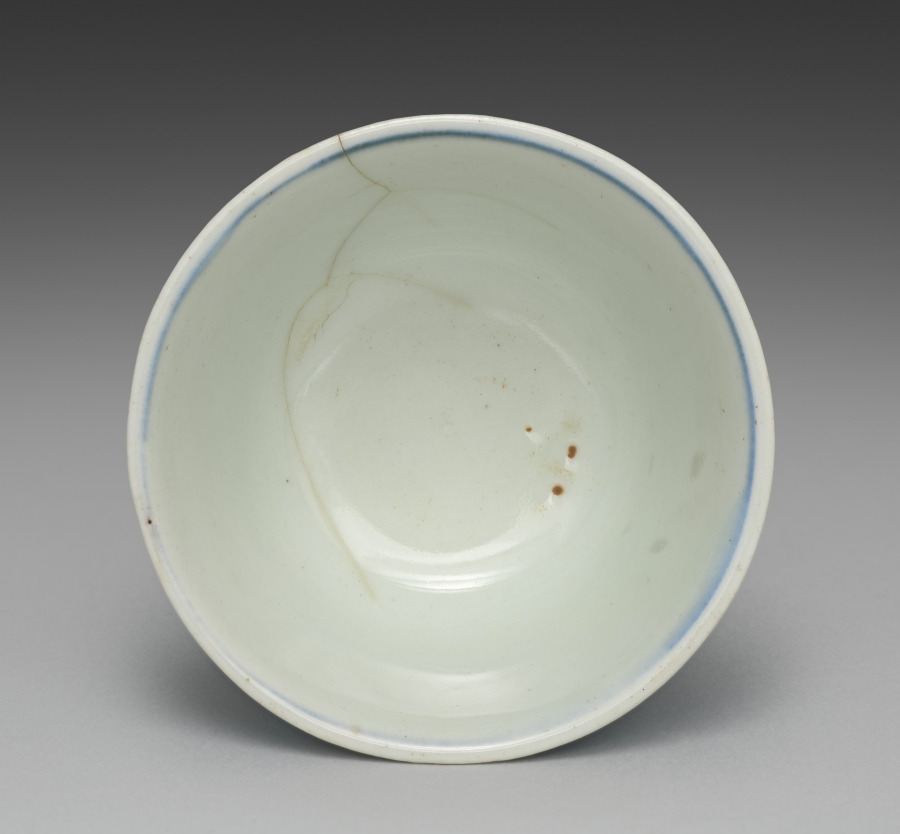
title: Cup from Tea Cups with Dragons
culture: Japan, Edo period (1615–1868)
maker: Seifū Yohei I (Japanese, 1801–1861)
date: 1840s–57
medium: One from a set of five tea cups; porcelain with underglaze blue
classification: Ceramic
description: Seifū Yohei I made both blue and white porcelains after Ming dynasty (1368–1644) Chinese wares fired in the kilns at Jingdezhen for export. He also made colorful stoneware in the style of his teacher, Nin’ami Dōhachi (Takahashi Dōhachi II) (1783–1855).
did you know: A small figure of an elephant serves as the handle for the lid.